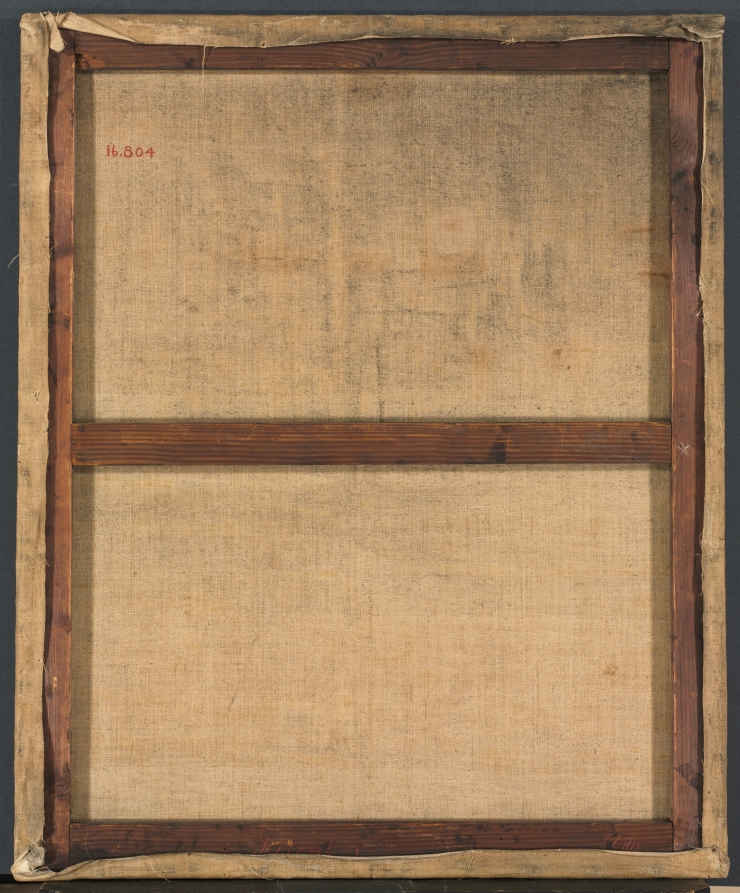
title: Portrait of Roberto Castiglione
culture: Italy, Cremona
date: early 1600s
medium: oil on canvas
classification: Painting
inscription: inscribed at bottom: ROBERTUS CASTILLIONEUS CREMONAE PRETOR ET IMPERIALIS VICARIUS AN D MCCXXXXVI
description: The inscription on the bottom of this painting identifies the sitter of this commemorative portrait as Roberto Castiglione, a magistrate and imperial vicar for the Spanish empire in the 1200s. His identity is further supported by the coat of arms in the upper left. A red shield ornamented by a lion holding a castle with three towers in his right paw, the crest belongs to the Castiglione family, which was primarily based in Milan, but had branches in Cremona as well. His gloved left hand holds a prayer book and the glove for his bare right hand, which holds back the fur trim of his mantle.